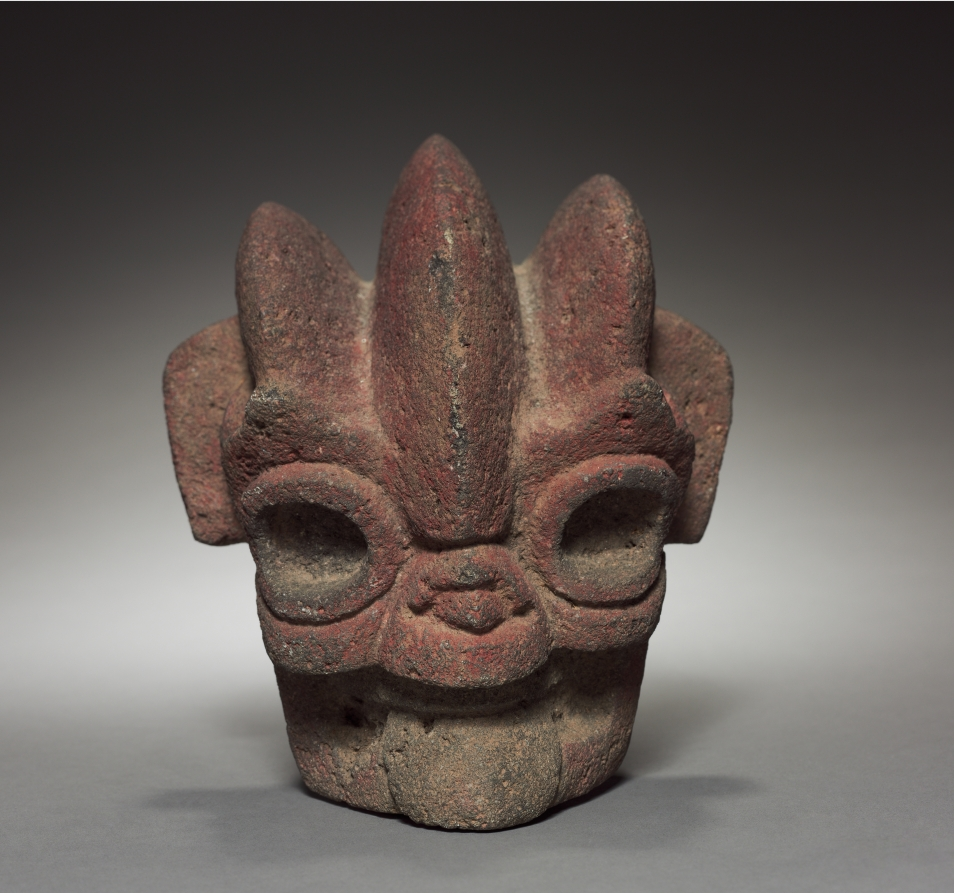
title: Head Hacha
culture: Mexico, Veracruz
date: 300–900 CE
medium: gray volcanic stone with red pigment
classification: Sculpture